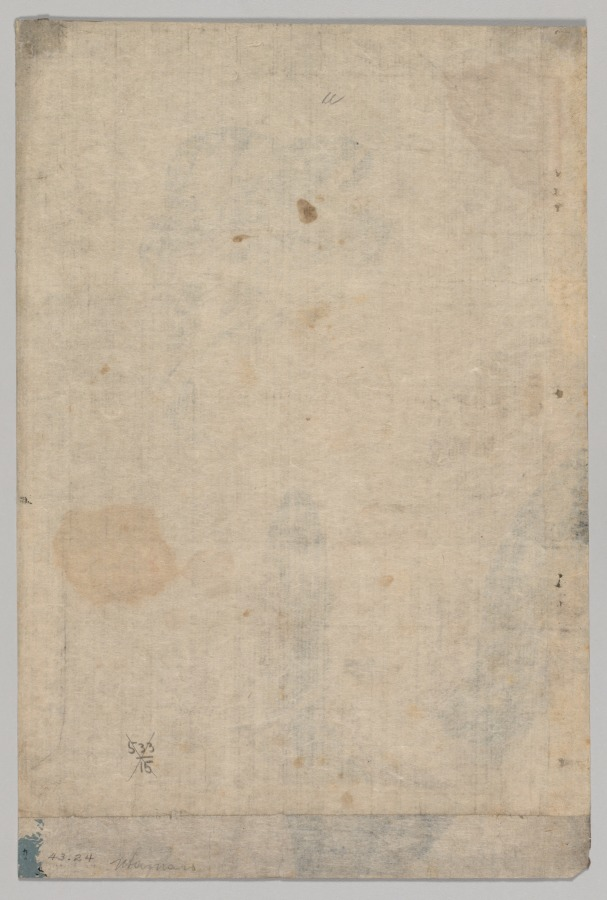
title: Woman Writing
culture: Japan, Edo period (1615–1868)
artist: Kitagawa Utamaro (Japanese, c. 1754–1806)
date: 1753–1806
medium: color woodblock print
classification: Print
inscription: Signature: Utamaro fude Publisher Seal: Tsuruya Kiyeimon